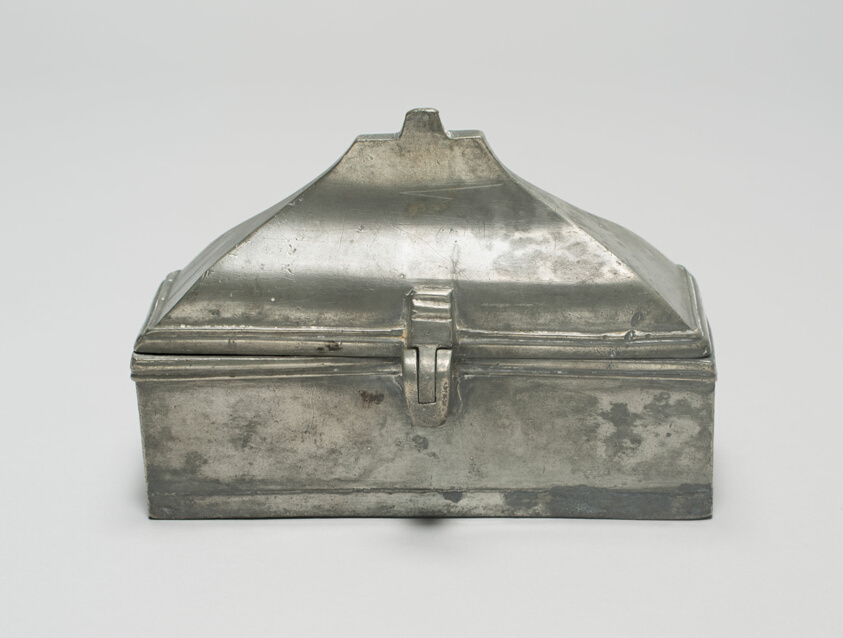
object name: Metalwork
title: Chrismatory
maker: France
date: possibly 17th century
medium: Pewter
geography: France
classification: pewter; metalwork; european decorative arts